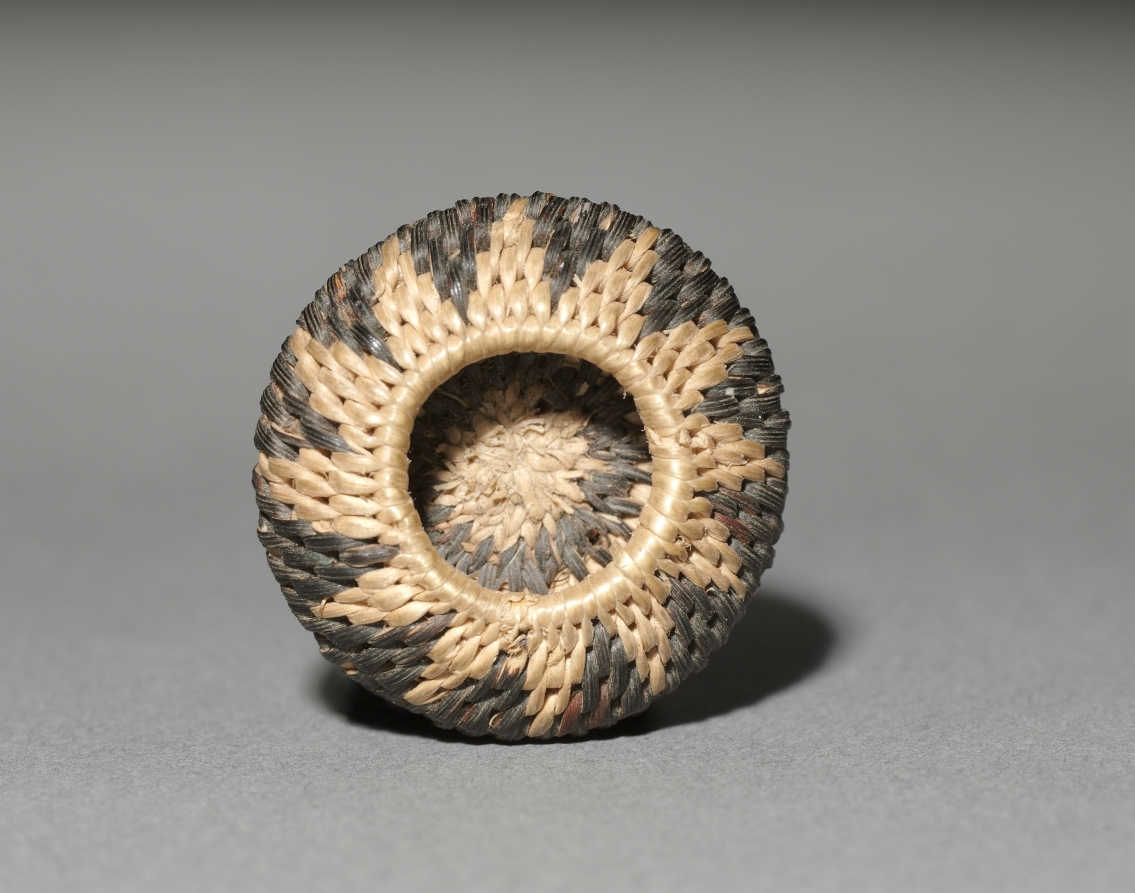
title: Miniature Round Basket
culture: California, Pomo, late 19th-early 20th century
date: late 1800s-early 1900s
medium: plant materials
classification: Basketry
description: Miniature baskets were made to demonstrate the basket-maker’s virtuoso skill, and these tiny marvels seem to be no exception—the smallest are only five millimeters wide but still patterned. For such fine work, dexterity was required as much for preparation of materials as for weaving.